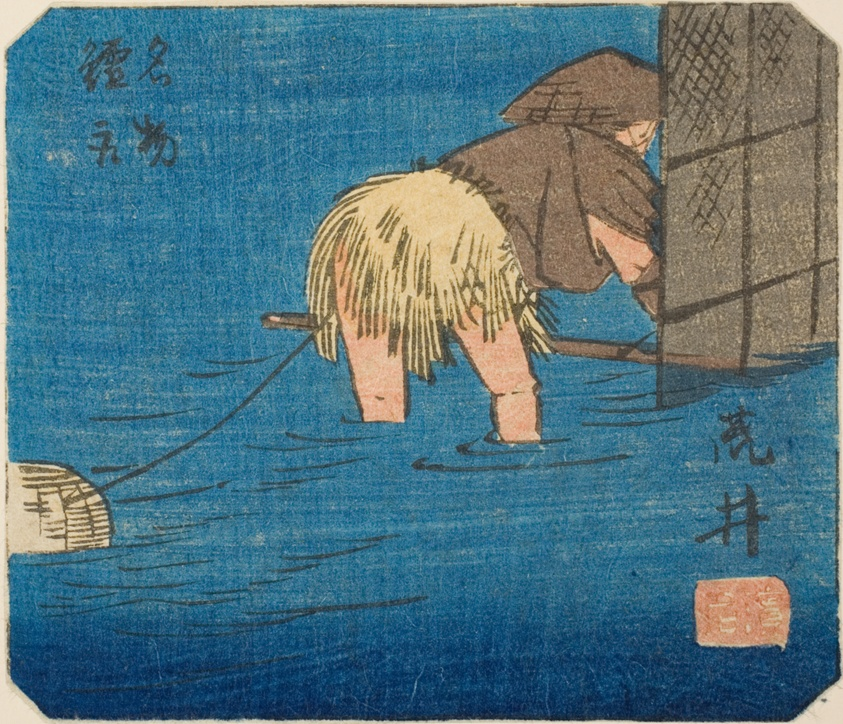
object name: Print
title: Arai, section of sheet no. 8 from the series "Cutouts of the Fifty-three Stations (Gojusan tsugi harimaze)"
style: Japanese (culture or style)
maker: Utagawa Hiroshige 歌川 広重; Japanese, 1797-1858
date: 1852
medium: Color woodblock print; section of harimaze sheet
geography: Japan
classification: woodblock print; print; asian art